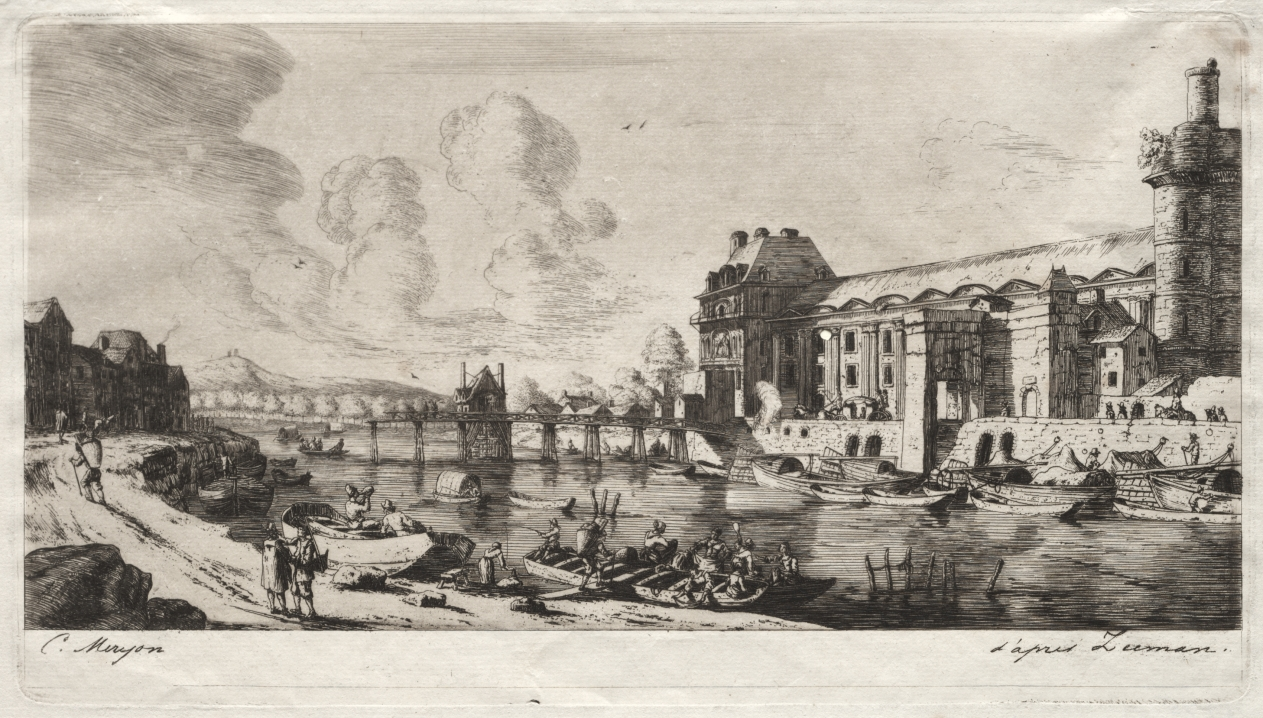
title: The Pavillon de Mademoiselle and part of the Louvre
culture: France, 19th century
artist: Charles Meryon (French, 1821–1868)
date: 1849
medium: etching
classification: Print